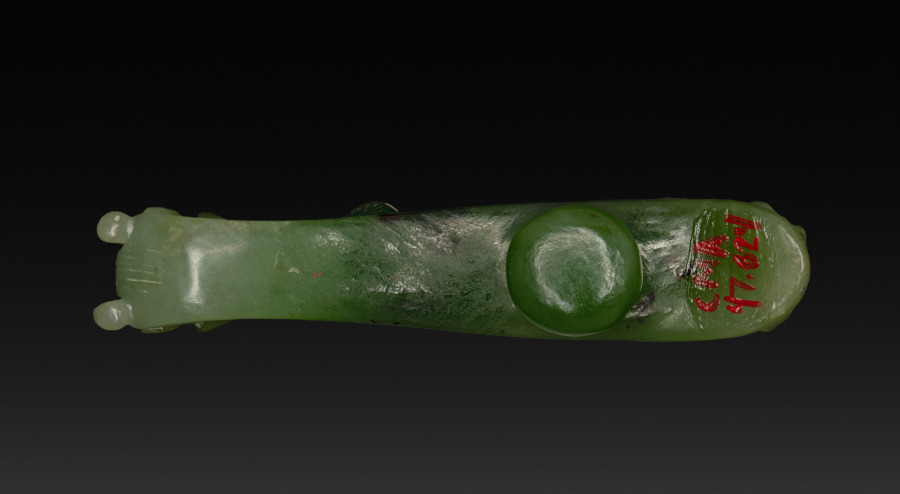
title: Buckle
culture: China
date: 1900s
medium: jade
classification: Jewelry